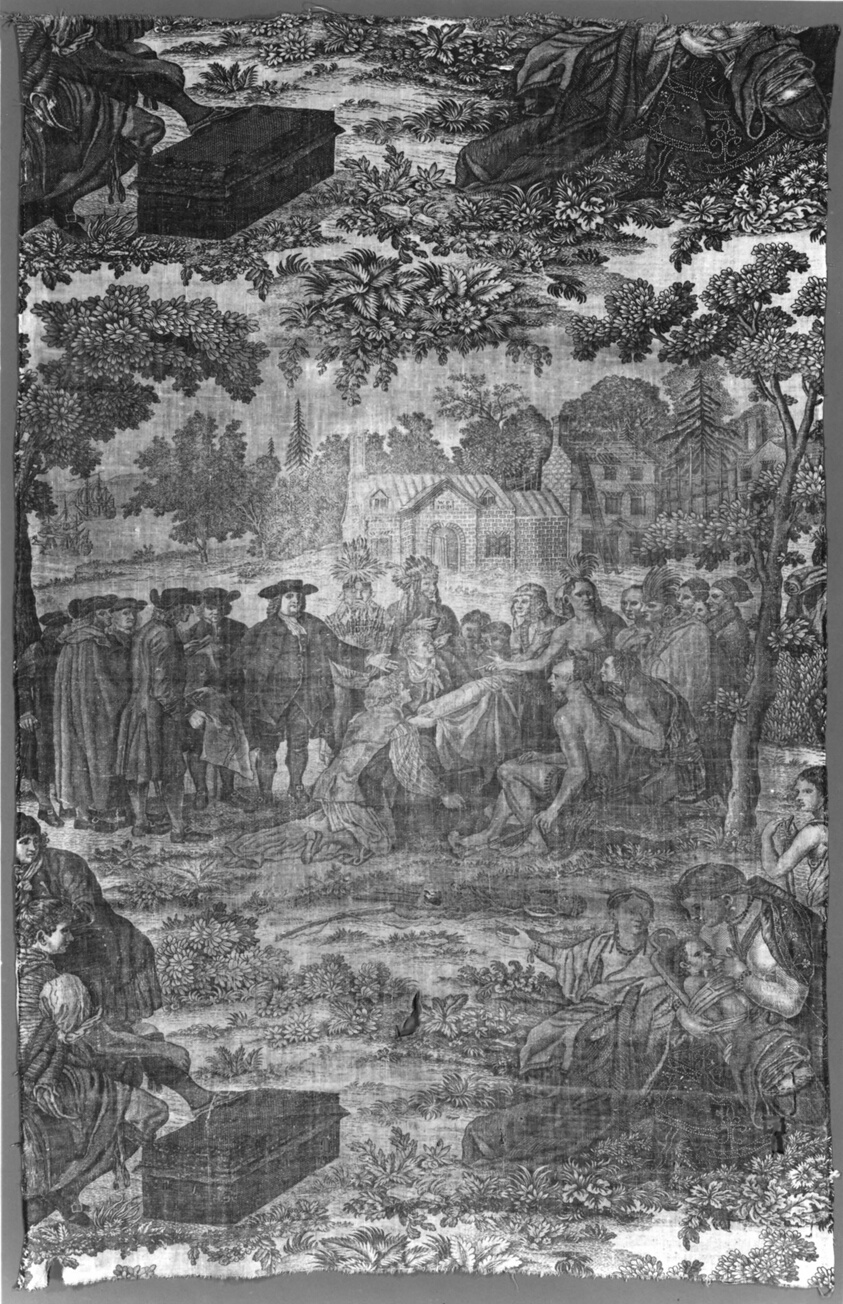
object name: Textile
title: William Penn's Treaty with the Indians (Furnishing Fabric)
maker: After an engraving by John Hall (English, 1739–1797), after a painting by Benjamin West (American, 1738–1826); England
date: c. 1800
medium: Cotton, plain weave; copperplate printed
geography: England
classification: textile; weaving - printed; furnishing textile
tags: propaganda